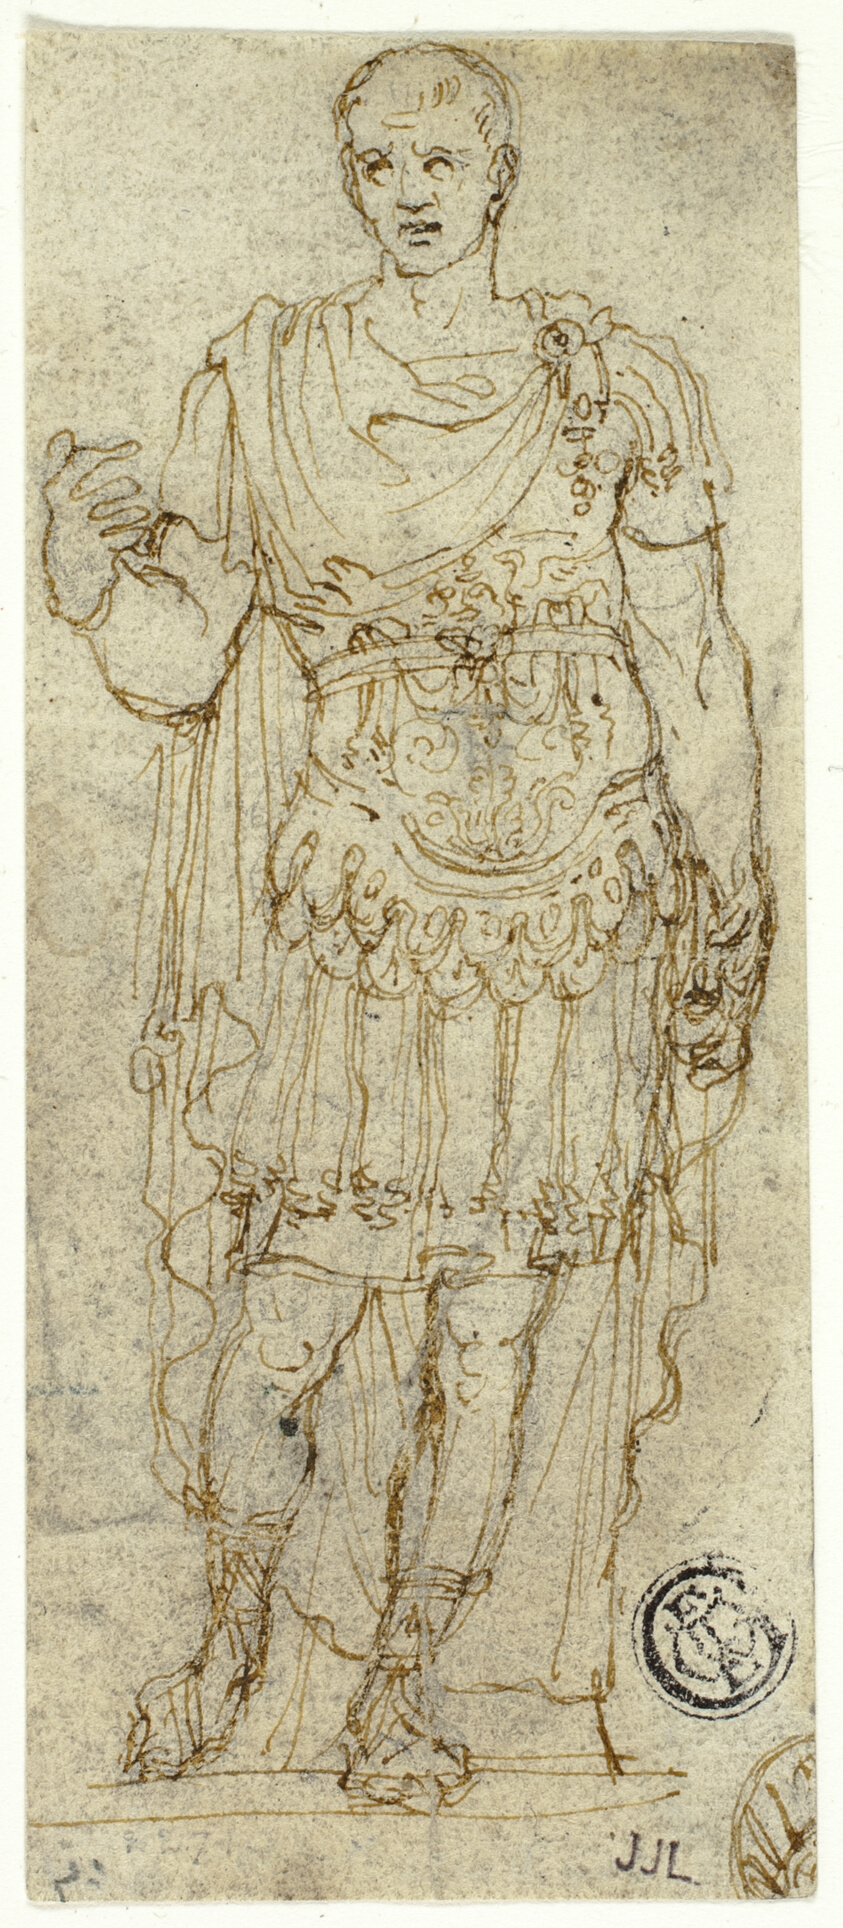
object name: Drawing and Watercolor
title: Statue of Augustus Caesar (recto and verso)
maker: Unknown Italian; Late 16th century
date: n.d. (recto); Late 16th c. (verso)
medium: Pen and brown ink over traces of black chalk (recto) and pen and blue ink (verso), on ivory laid paper, with incising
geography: Italy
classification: pen and ink drawings; drawings (visual works); prints and drawing